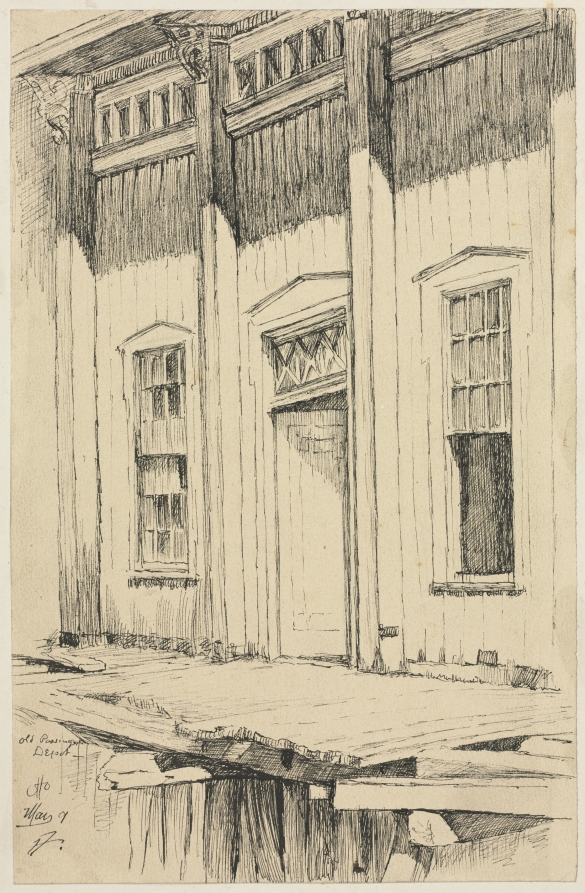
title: Old Passenger Depot, Cleveland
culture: America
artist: Otto H. Bacher (American, 1856–1909)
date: c .1870–1909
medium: ink on paper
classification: Drawing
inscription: On verso: "Otto, May 9"